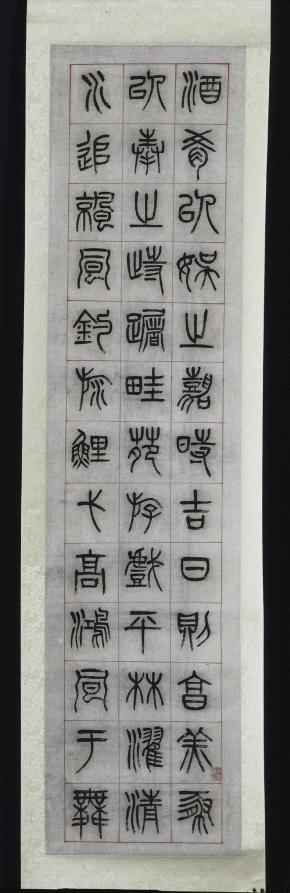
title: On Happiness, Calligraphy in Seal Script Style (zhuanshu)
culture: China, Changsu, Qing dynasty (1644-1911)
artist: Yang Yisun (Chinese, 1813–1881)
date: 1871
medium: hanging scroll, ink on paper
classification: Painting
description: Yang Yisun transcribed this ancient text on six narrow scrolls, starting at the top right and ending at the bottom left. Yang emphasizes the text’s historic nature by using the seal script style found on stone steles and bronze vessels. On Happiness features reflections of a scholar on a leisurely life in the countryside, composed by Han dynasty official Zhongchang Tong, who died the year the Han dynasty collapsed (AD 220). The idyllic life described in the text may bean evocation of the past in a time of national crisis. A decade before Yang wrote these scrolls, Anglo-French forces had looted and burned the Summer Palace in Beijing. At the same time, the domestic Taiping rebellion (1850–64), led by a religious fanatic to overthrow the Qing government, had devastated Yang’s homeland, the Jiangnan region, with an estimated 20 million lives lost.